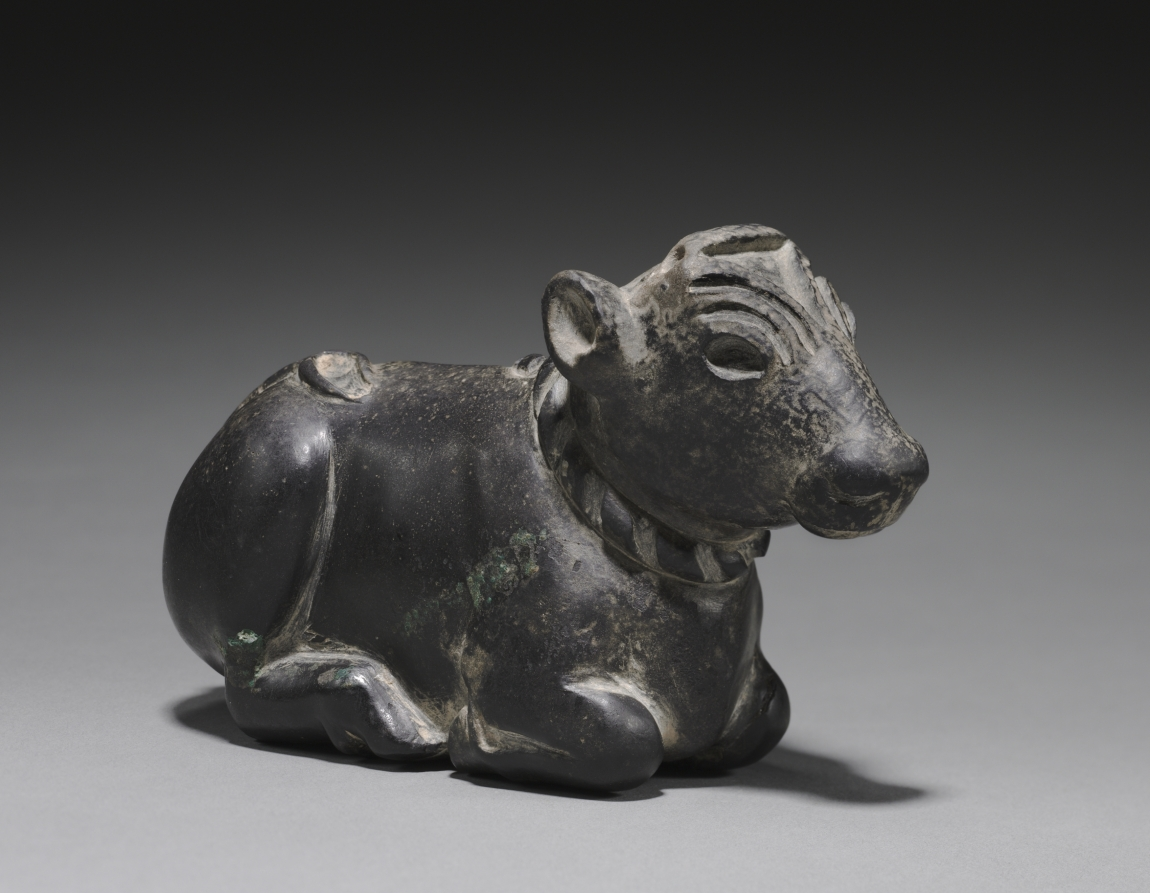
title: Bull Calf Polemount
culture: Sumerian, Iraq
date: c. 2700 BCE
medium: basalt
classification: Sculpture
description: Like most Mesopotamian sculptures in the round, this small bull was an object of worship in a temple. Its eyes, the triangle on the forehead, and the stripes in the rope were originally embellished with contrasting colored stones, or bone. The inlays are lost, but the sculpture itself is one of the very few original cult statues that have survived.